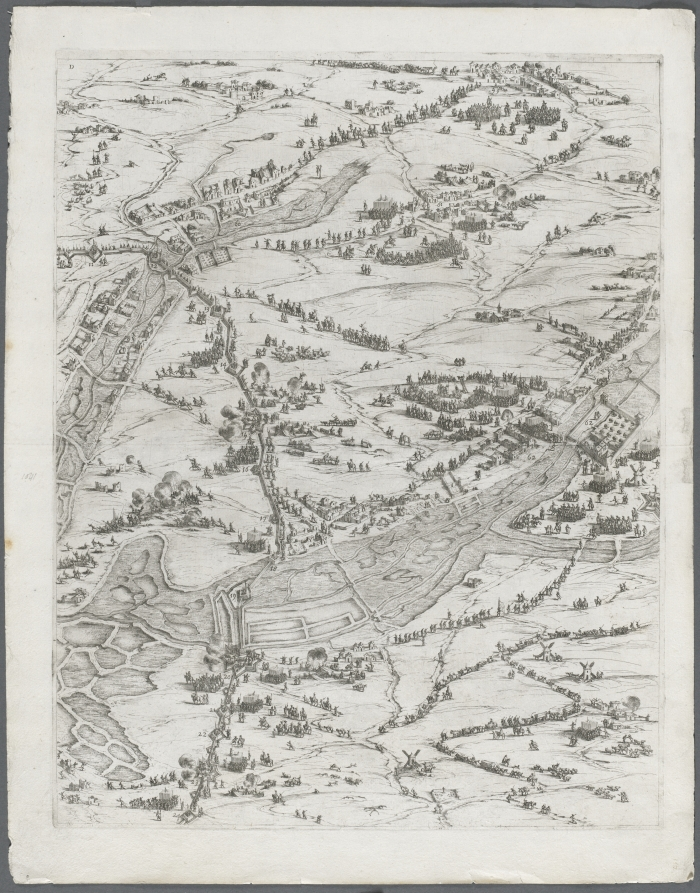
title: The Siege of La Rochelle: Plate 7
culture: France, 17th century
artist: Jacques Callot (French, 1592–1635)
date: 1628–1630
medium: etching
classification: Print